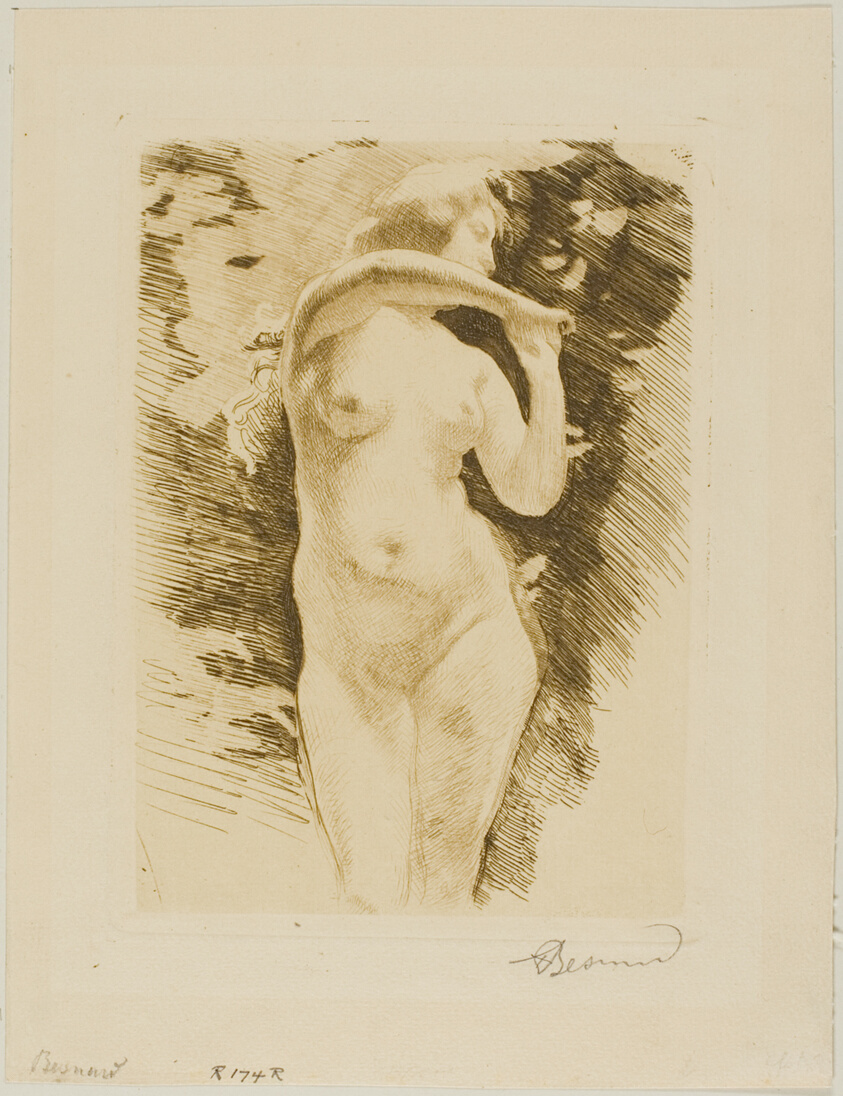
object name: Print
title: Eve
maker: Albert Besnard (French, 1849-1934)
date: 1896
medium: Etching and drypoint in bistre ink on ivory laid paper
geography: France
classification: etching; print; prints and drawing